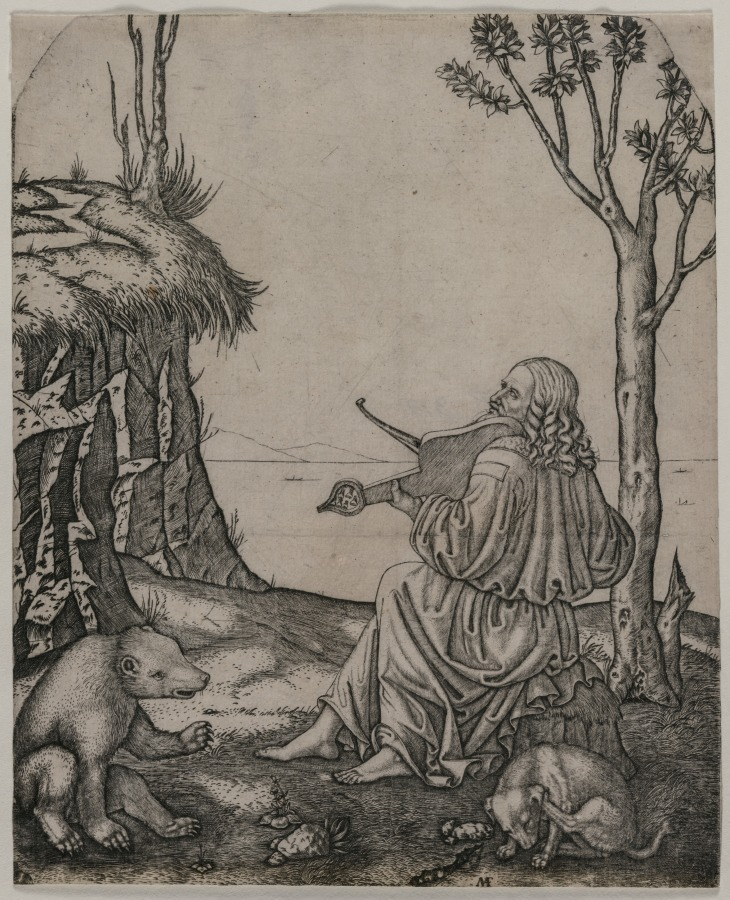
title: Orpheus Charming the Animals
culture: Italy, 16th century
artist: Marcantonio Raimondi (Italian, 1470/82–1527/34)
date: c. 1505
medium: engraving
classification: Print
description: In Greek mythology, Orpheus was a singer and poet. He was given a lyre by Apollo, the god of music, and was taught to play by the Muses. His songs, melodiously accompanied by his instrument, were so beautiful that they pacified wild animals, calmed the seas, and animated trees and rocks. Here, a subdued bear is depicted in close proximity to a dog, and stones have gathered at the musician’s feet. The instrument depicted here is a lira da braccio, an instrument played by Leonardo da Vinci at the time when this engraving was made.